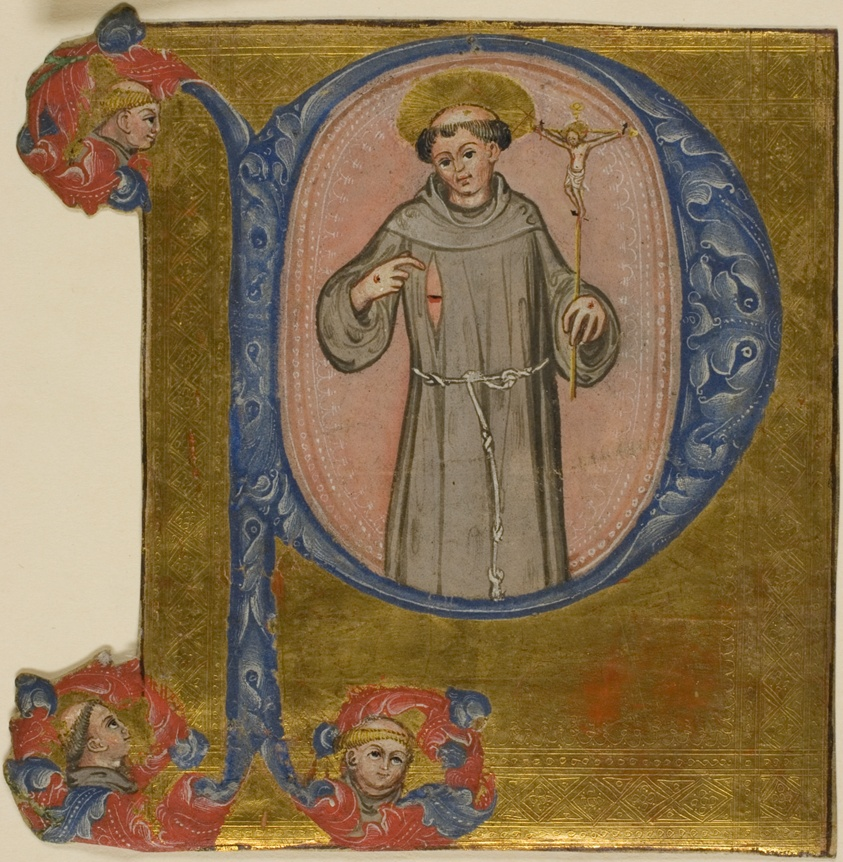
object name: Drawing and Watercolor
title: Saint Francis in a Historiated Initial "P"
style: medieval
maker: Italian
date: 1375/99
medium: Manuscript cutting in tempera and gold leaf, with incising, on vellum, with inscriptions in black or brown-black ink, verso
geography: Italy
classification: tempera; manuscript; drawings (visual works); prints and drawing